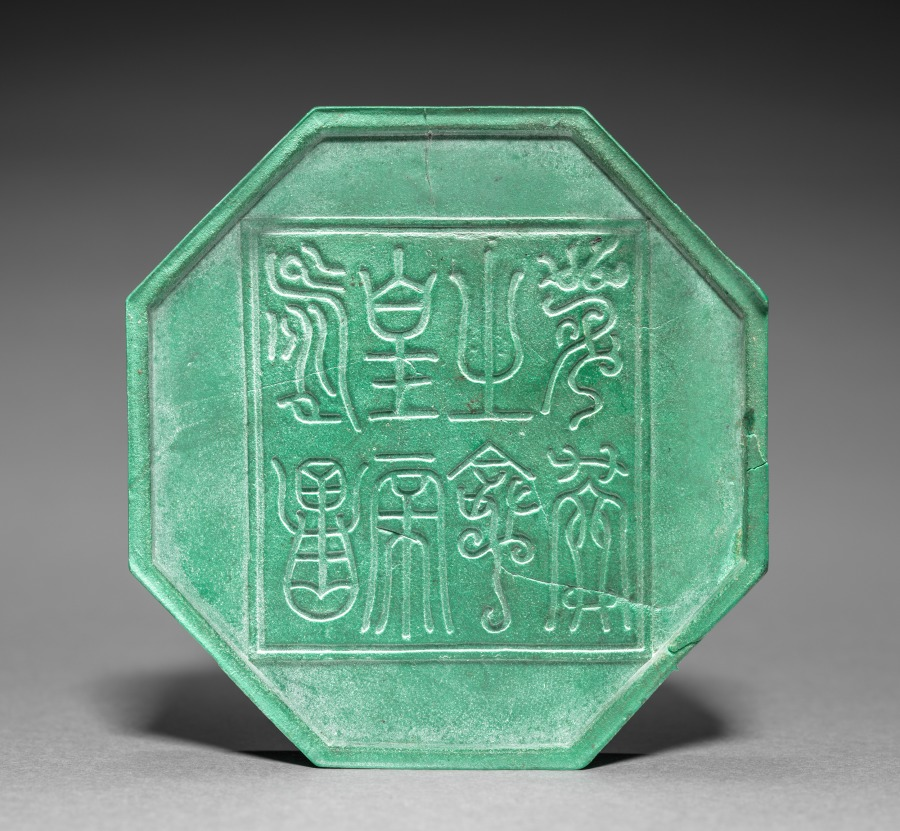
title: Octagonal Ink Cake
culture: China, Ming dynasty (1368–1644)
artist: attributed to Cheng Junfang (Chinese, active c. 1570-c. 1624)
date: 1622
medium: green ink cake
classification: Miscellaneous